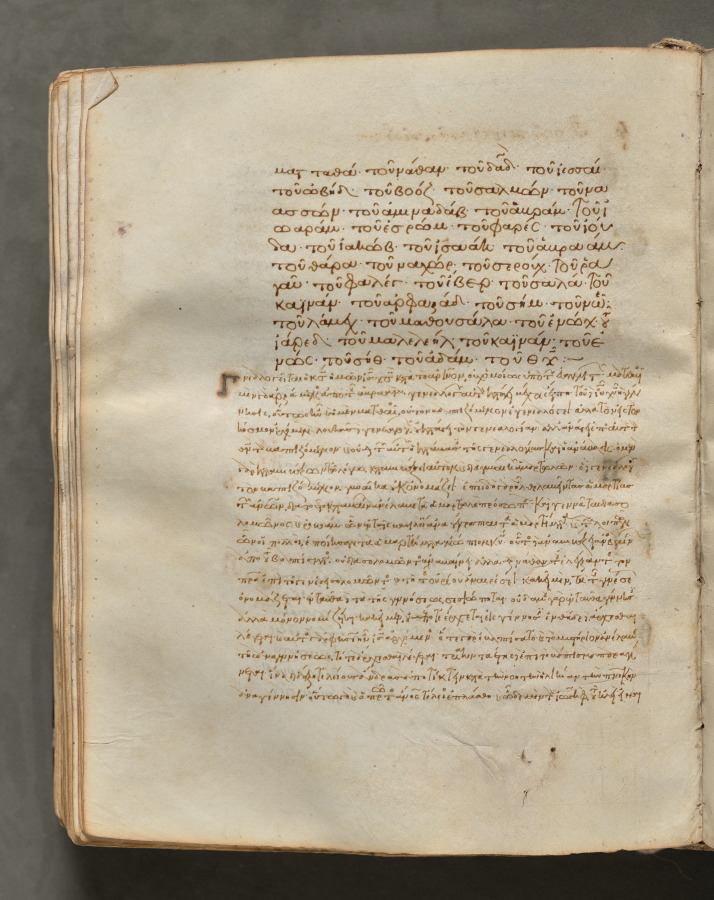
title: Text, folio 216 (verso), from a Gospel Book with Commentaries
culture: Byzantium, Constantinople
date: c. 1000–1100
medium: ink, tempera, and gold on vellum; leather binding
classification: Bound Volume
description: Each of the four gospels in this book opens on a page with brilliantly illuminated borders depicting the author of the text as well as birds-principally peacocks, symbols of the immortality of the soul-and fountains, representing the fountain of life and the salvation of the soul. This volume consists of 428 leaves with texts in Greek. Its level of sophistication suggests that it was probably written and decorated in a monastery in Constantinople.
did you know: Gospel Books were carried in procession through Byzantine churches.